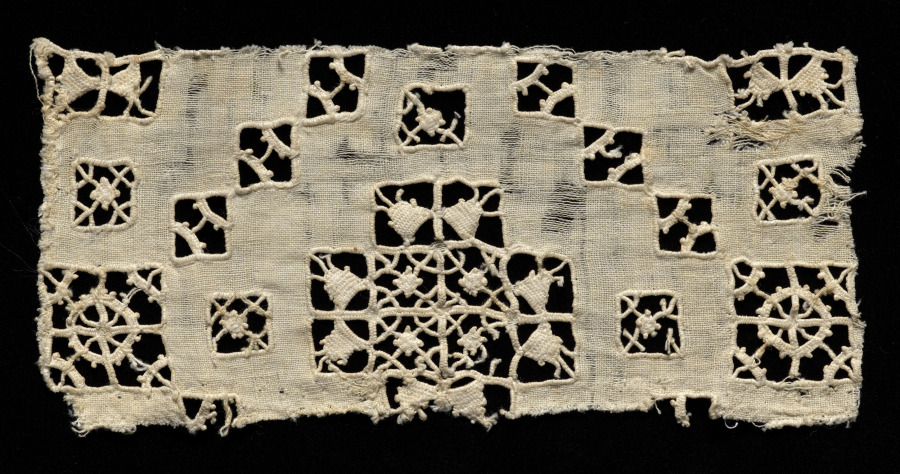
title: Lace Fragment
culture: Italy, 1600s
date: 1600s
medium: Linen: needle lace (cutwork and reticella)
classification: Lace